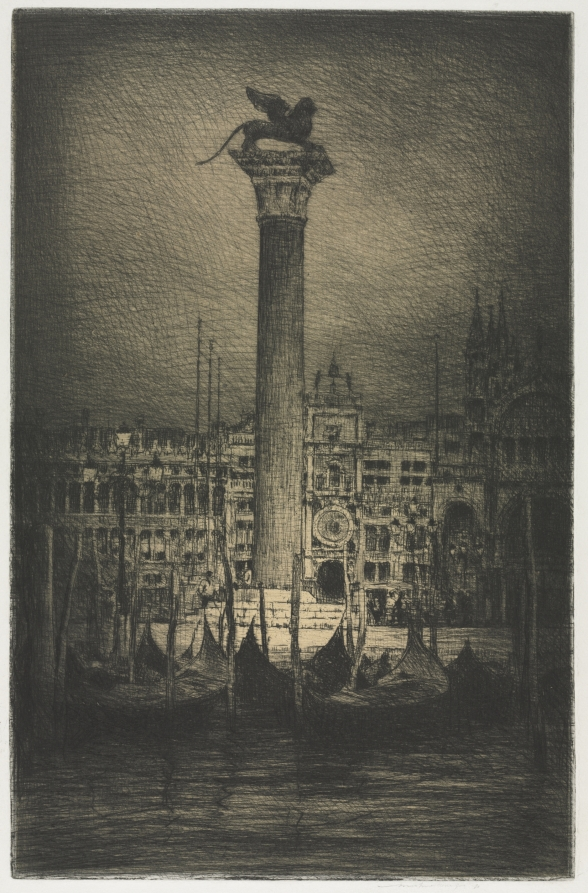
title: St. Mark's Piazza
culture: England, 19th century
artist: Mortimer Menpes (British, 1860–1938)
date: 1910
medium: etching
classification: Print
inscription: signed, below platemark, in graphite; titled, lower edge, in graphite; left corner: "482 264 4/14/6"